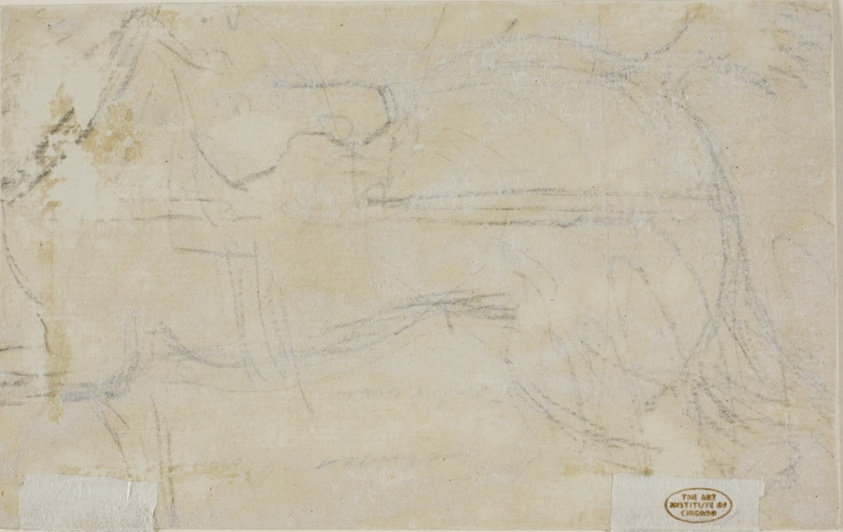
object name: Drawing and Watercolor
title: Cavalry on the March (recto); Fragment of Sketch of Horse (verso)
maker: Thomas Rowlandson (English, 1756-1827)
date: 1794 (recto); n.d. (verso)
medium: Pen and brown ink, with brush and watercolor, on ivory wove paper, laid down on card (recto), and black chalk on ivory wove card (verso)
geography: England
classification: watercolor; drawings (visual works); prints and drawing